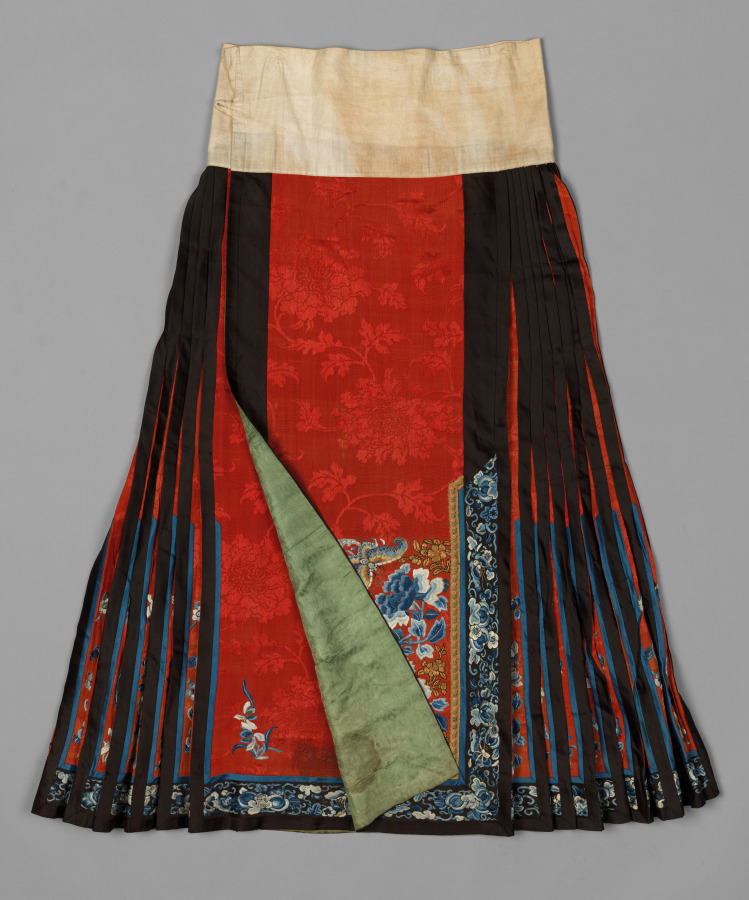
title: Skirt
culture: China, Qing dynasty (1644-1911)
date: 1800s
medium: Silk and gold thread: embroidery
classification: Garment